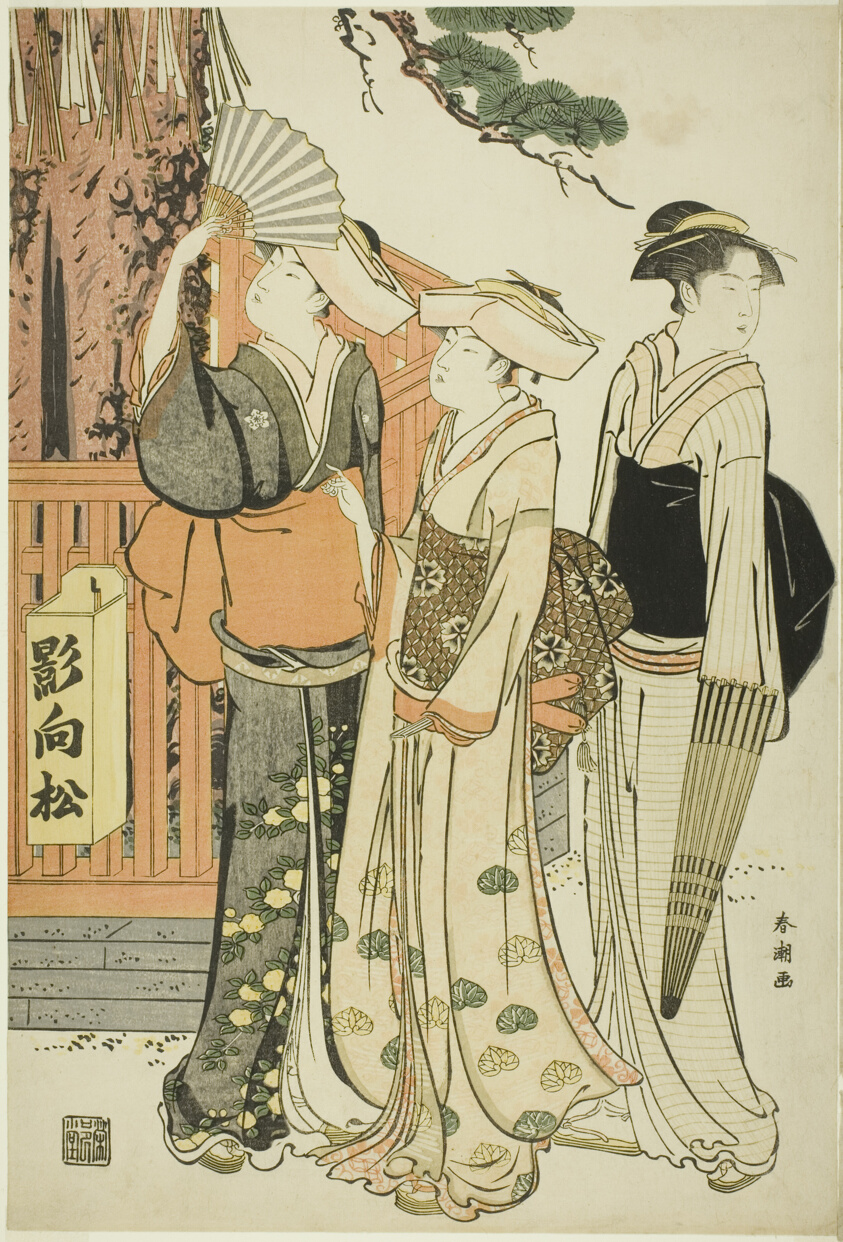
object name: Print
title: Three Women at the Base of a Sacred Pine Tree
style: Japanese (culture or style)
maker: Katsukawa Shuncho; Japanese, active c. 1780-1801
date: c. 1790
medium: Color woodblock print; oban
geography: Japan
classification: print; asian art